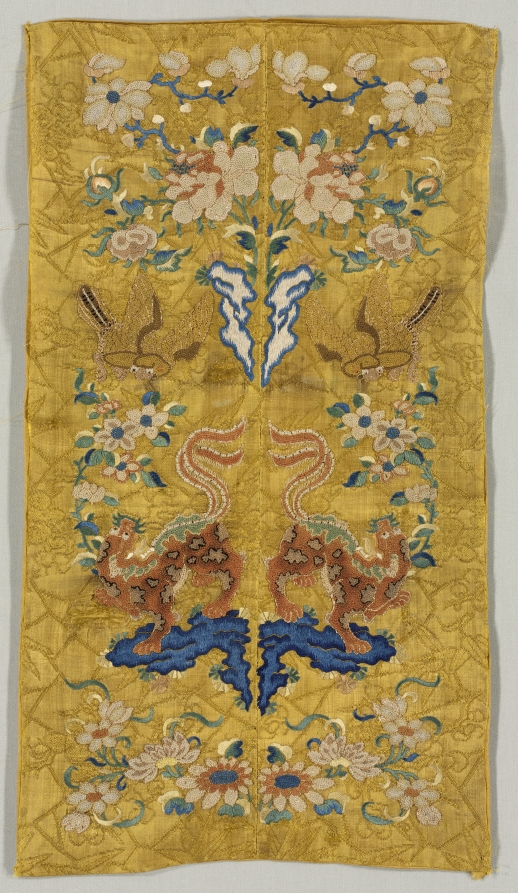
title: Sleeve Bands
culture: China, early 19th century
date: early 1800s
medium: embroidery, silk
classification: Garment